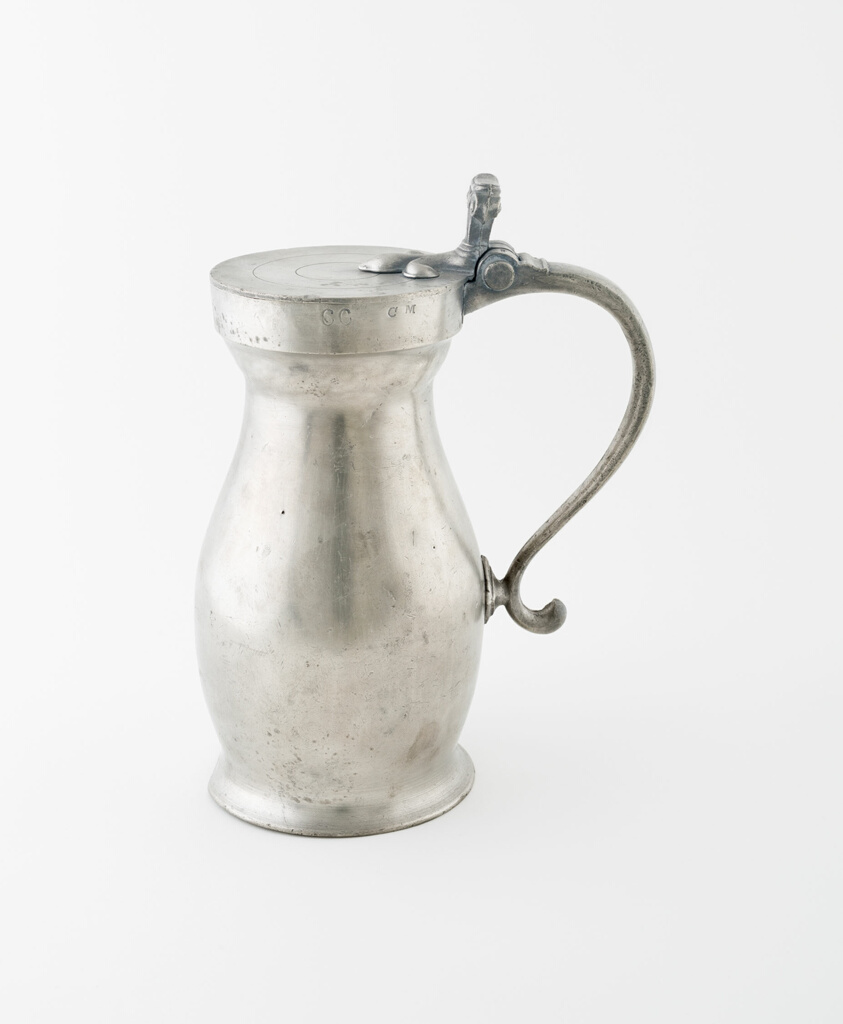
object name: Metalwork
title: Half Gallon Wine Measure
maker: England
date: c. 1780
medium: Pewter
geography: England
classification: drinking vessel; pewter; metalwork; european decorative arts